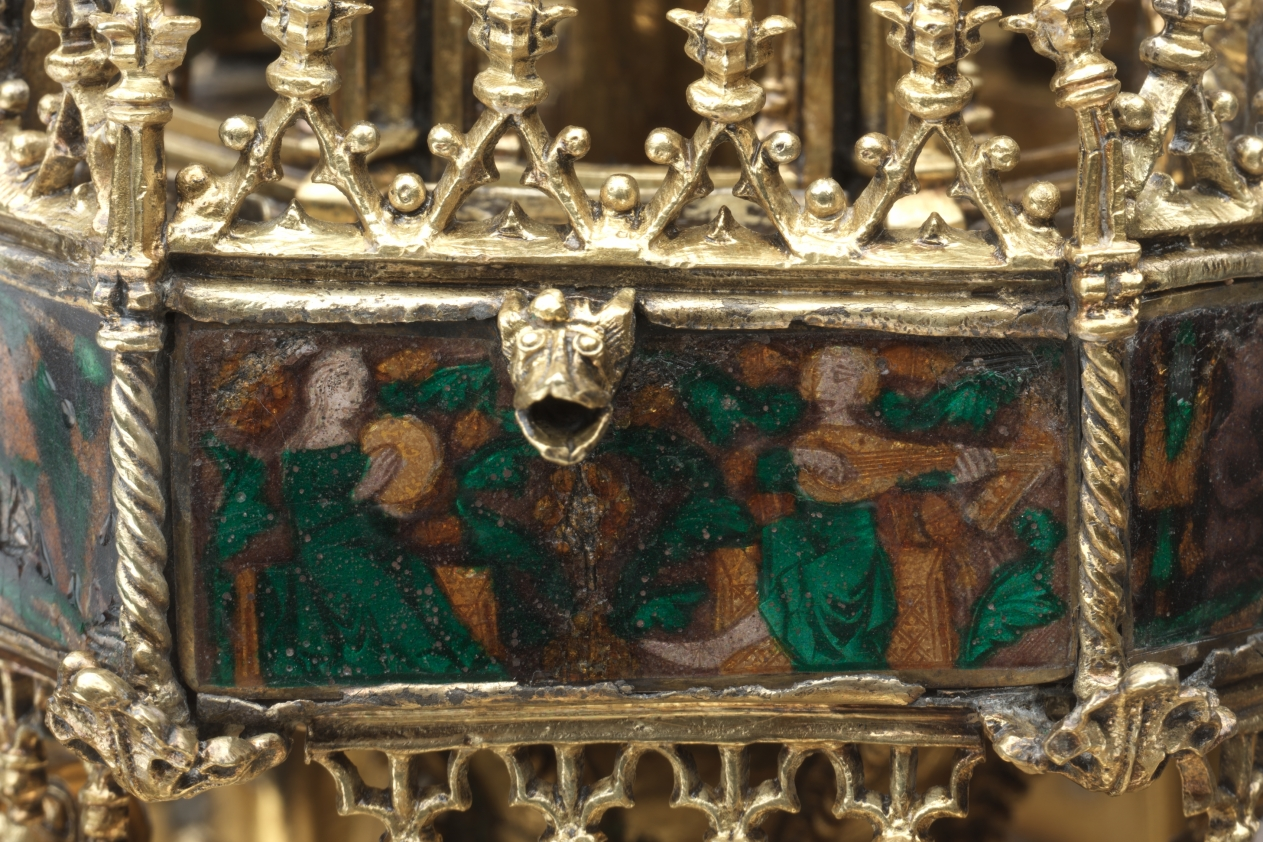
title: Table Fountain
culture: France, Paris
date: c. 1320–40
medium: gilt-silver and translucent enamels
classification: Metalwork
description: Conceptually and stylistically, this object is beyond all else a piece of Gothic architecture in miniature with vaults, pinnacles, columns, and traceried arches. Though the artist who created it is unknown, he was unquestionably inspired by the great Gothic buildings of his time. The table fountain is a three-tiered assembly combining cast elements with bent sheets of gilt-silver. To these have been attached a series of enamel plaques representing grotesque figures, some of which play musical instruments. Water wheels and bells were added to capture motion and sound. The rich detail, precious materials, and involved ornamentation of this deluxe object suggest it would have been expensive to produce and highly treasured by its original owner, someone of high status, and would have been deployed as an object of spectacle. This is the most complete example of its type known to survive from the Middle Ages. Medieval inventories reveal that small fountains like this, often taking various forms, and generally made from precious metals, once existed in large numbers, thus making the Cleveland table fountain an extremely rare object.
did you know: This fountain with its minute architectural details and finely made enamel plaques displayed the wealth and refinement of the owner as it entertained his guests. Imagine hearing the ringing of the tiny bells when this fountain was in use.